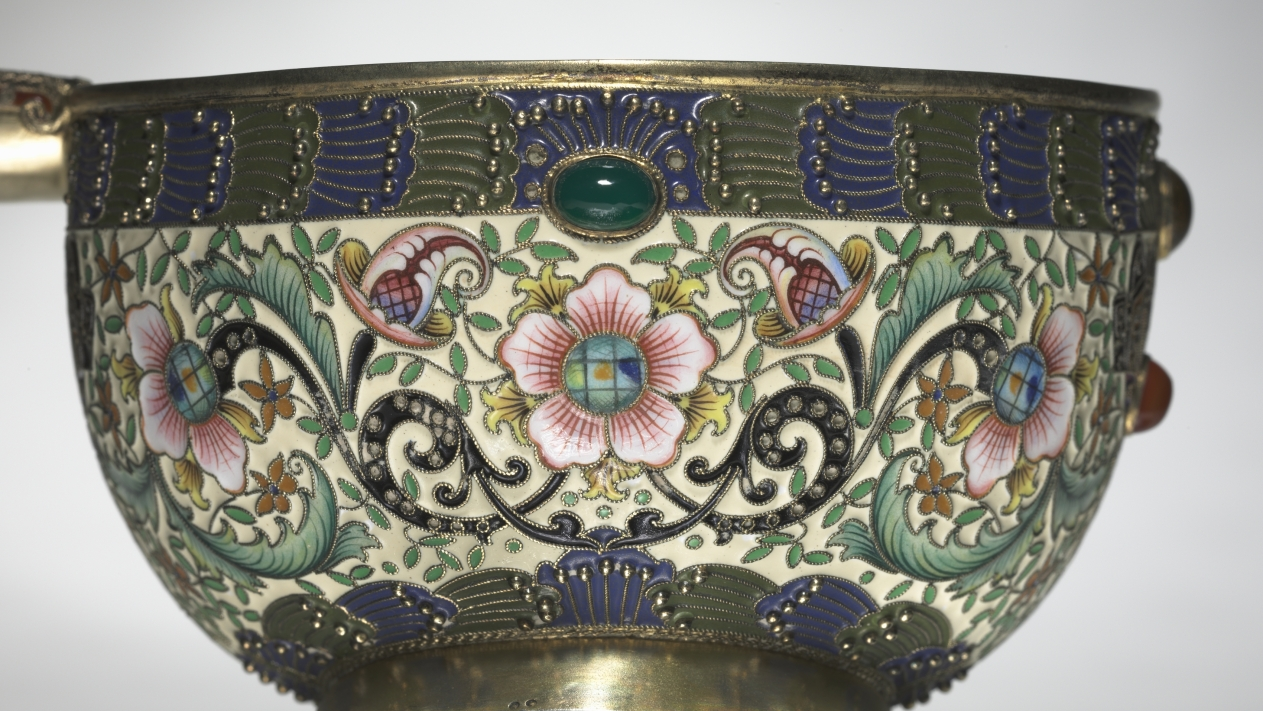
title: Kovsh (Cup)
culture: Russia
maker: House of Fabergé (Russian, 1842–1918)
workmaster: Feodor Ivanovich Rückert (Russian, 1840–1917)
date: 1896–1906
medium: silver gilt, enamel, cabochon gems, chrysoprases, carnelians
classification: Miscellaneous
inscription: inscribed on bottom: "CH" in script monogram (owner's initials).